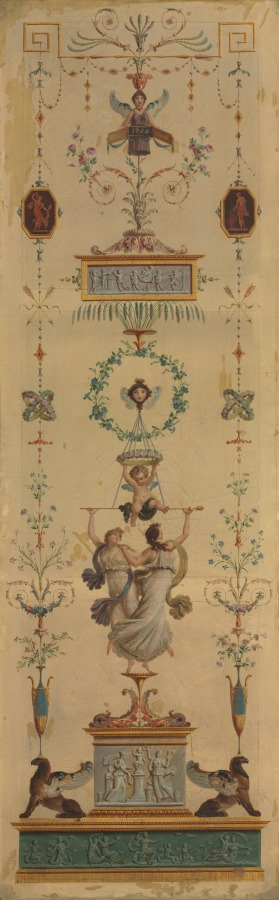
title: Decorative Panel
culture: France, 18th century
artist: Pierre Rousseau (French, 1751–1829)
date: 1790s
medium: oil on canvas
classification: Painting